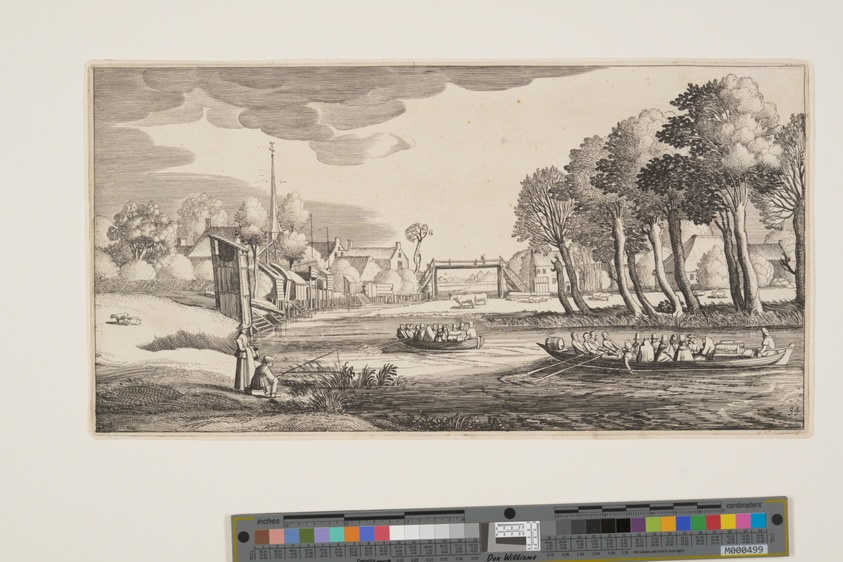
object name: Print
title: Travellers in Row-Boats approaching a Village, from Landscapes (Playsante Lantschappen)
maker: Attributed to Claes Jansz. Visscher II (Dutch, 1586-1652); after Jan van de Velde II (Dutch, c. 1593-1641)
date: c. 1641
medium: Etching, with engraving, on ivory laid paper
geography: Netherlands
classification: etching; paper; print; prints and drawing